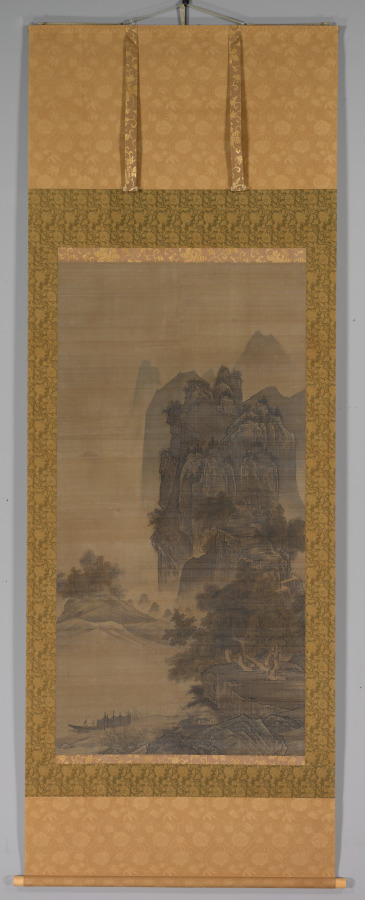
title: Sunset Glow over a Fishing Village, from Eight Views of Xiao-Xiang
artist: follower of Sesshū Tōyō (Japanese, 1420–1506)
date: 1460s–1550s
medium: Hanging scroll from a set of eight; ink and color on silk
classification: Painting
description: This painting and CMA 2015.589 belong to a group that was likely mounted as a pair of four-panel folding screens focusing on the Eight Views of Xiao-Xiang, a theme centered on an area in southern China. This one represents the motif “Sunset Glow Over a Fishing Village.” Both emulate the style of Chinese painter Li Tang (about 1050–after 1130). Some scholars believe the paintings are the work of Sesshū Tōyō (1420–1506), the only Japanese painter of his day to have traveled to China.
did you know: This painting incited robust scholarly debate in both Japan and the United States about its date.